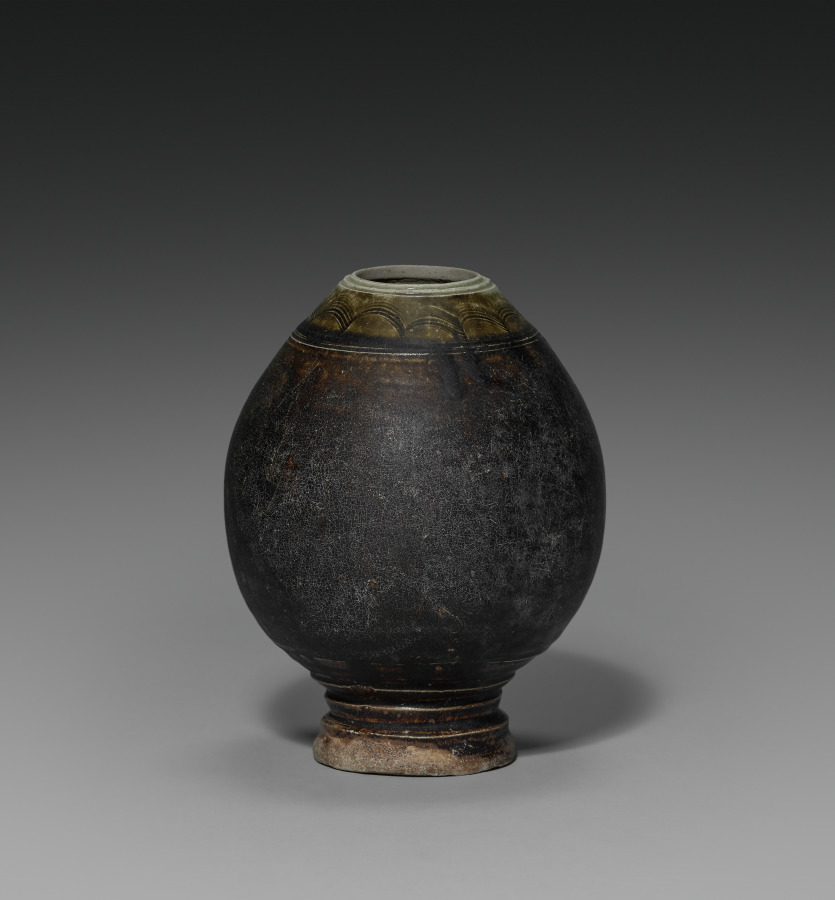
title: Jar in the Shape of a Fruit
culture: Cambodia, Northeast Thai kiln, Khmer Ware, Angkor Wat/Bayon period, 12th century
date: 1100s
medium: glazed pottery with brown slip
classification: Ceramic